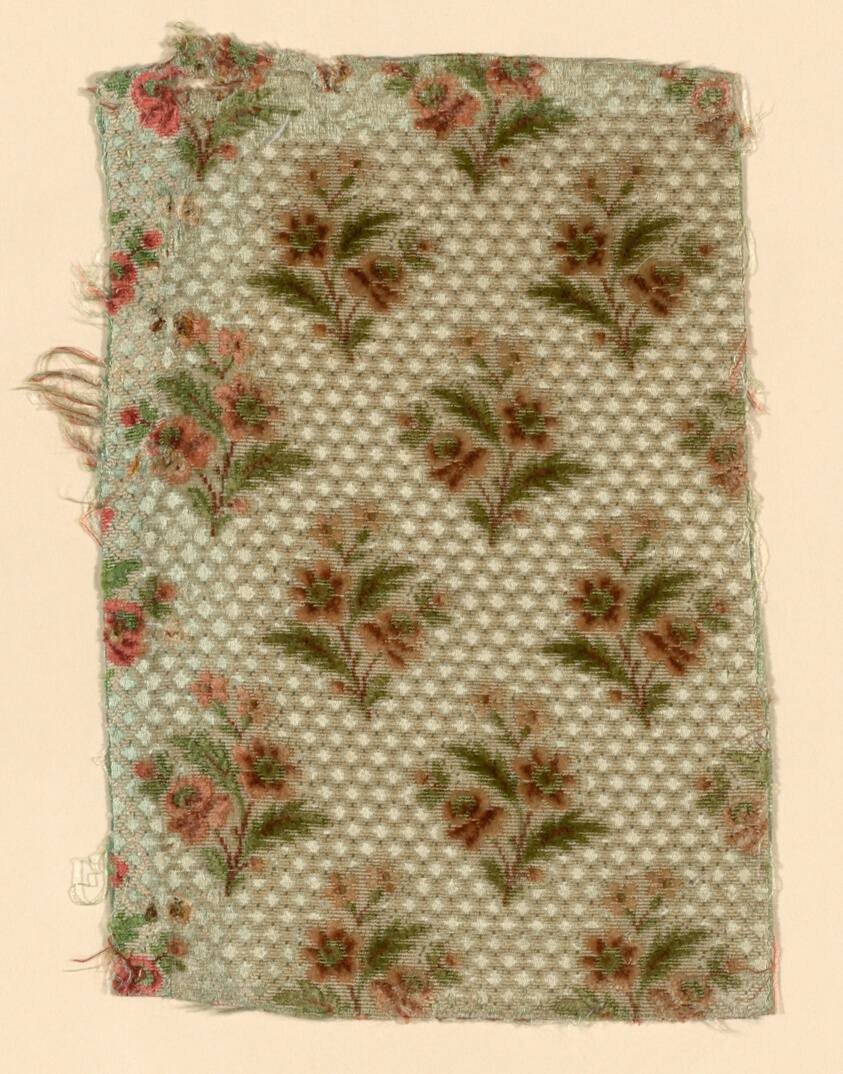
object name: Textile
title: Fragment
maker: France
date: 1750/75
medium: Silk, cut, uncut, and voided velvet against satin weave foundation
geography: France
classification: textile; weaving - velvet